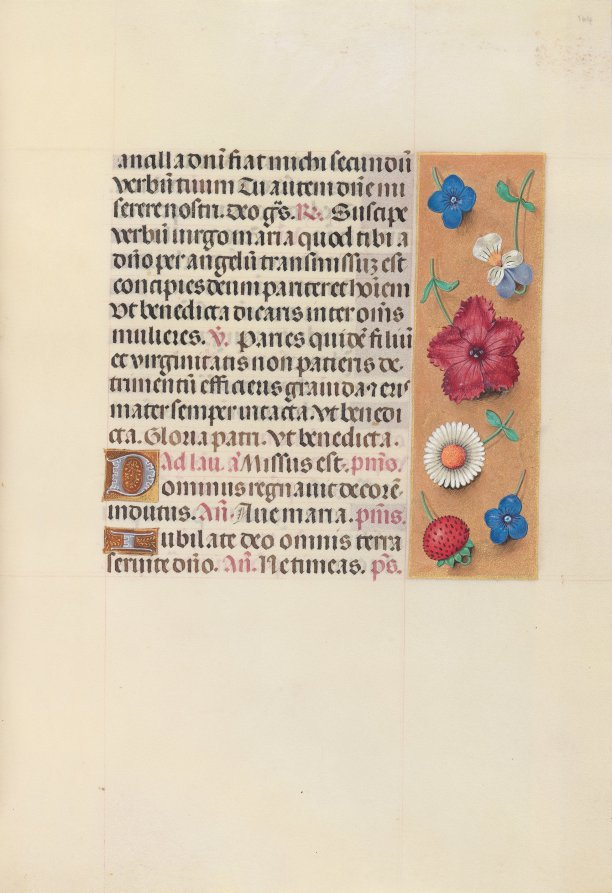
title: Hours of Queen Isabella the Catholic, Queen of Spain: Fol. 164r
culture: Flanders, Ghent and Bruges, late 15th century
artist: Master of the First Prayerbook of Maximillian (Flemish, c. 1444–1519)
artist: and Associates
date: c. 1500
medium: ink, tempera, and gold on vellum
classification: Bound Volume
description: This manuscript was illuminated by a circle of at least five highly organized manuscript painters active in the Flemish cities of Ghent and Bruges. The principal illuminator was Alexander Bening, who painted the majority of the book's miniatures. Manuscripts produced by this circle of artists are renowned for the decoration of their borders, which typically feature a rich variety of realistically-painted flowers, birds, and butterflies. This prayer book, called a book of hours, was intended not for a cleric, but for the private devotions of a lay person-in this case, Isabella the Catholic, Queen of Spain (1451-1504). Isabella's coat of arms embellishes the book's frontispiece. It is unlikely that the book was commissioned by the Queen herself; rather, she probably received it as a diplomatic gift from someone courting her patronage, perhaps Cardinal Francisco Jimenez de Cisneros. A Franciscan friar, Jimenez was dependent upon Isabella for his advancement, first to the post of Queen's confessor in 1492, and then to Archbishop of Toledo in 1495.